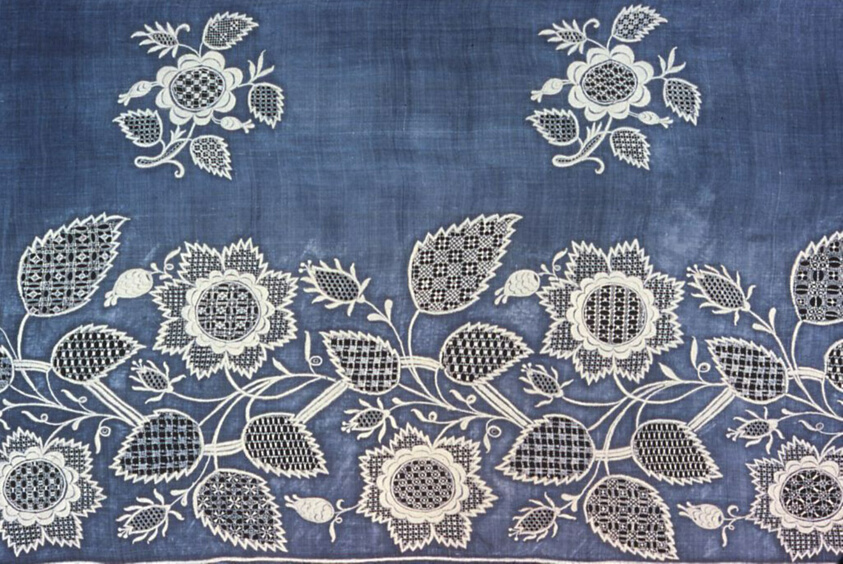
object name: Costume and Accessories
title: Two Panels from a Skirt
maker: Philippines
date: c. 1830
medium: Pineapple fiber, plain weave; cut and drawn work embroidered with cotton in cross, hem, overcast, satin, and twined double running stitches; bead insertion, interlocking lace, and wave filling stitches; laid work and darned wheels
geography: Philippines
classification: textile; needlework (visual works); costume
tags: fashion